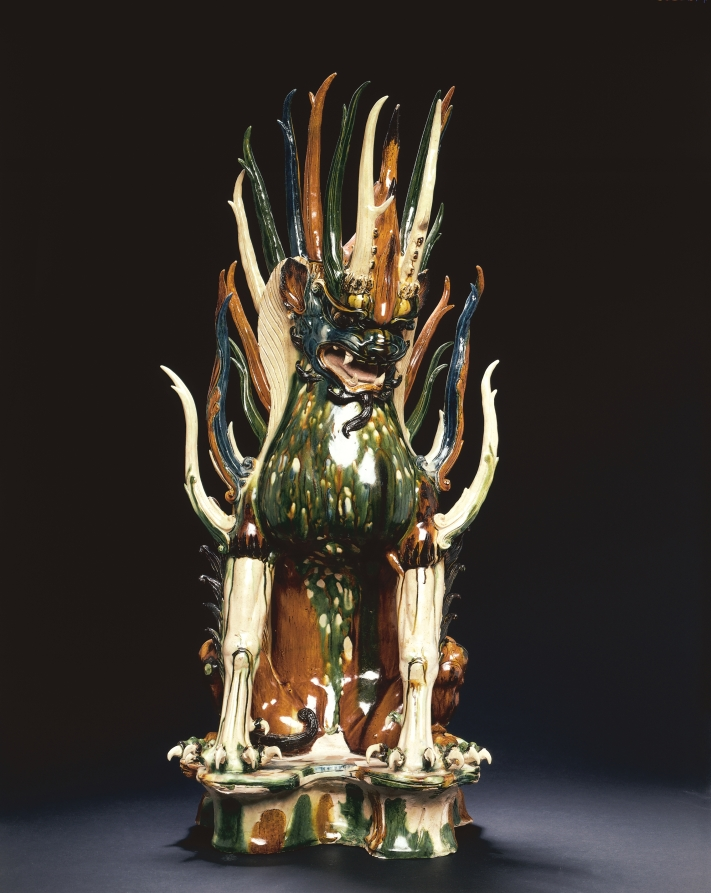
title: Tomb Guardian with Animal Head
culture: China, probably Shaanxi province, Xi'an, Tang dynasty (618-907)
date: early 700s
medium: glazed earthenware, sancai (three-color) ware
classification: Ceramic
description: With their fierce expressions and exaggerated physical features, fantastic guardian creatures were intended to guard the entrance to a tomb, warding off evil as well as keeping the soul of the deceased from wandering. Known as "earth spirits" or qitou, this one has an animal face and a pair of antlers growing above its eyebrows; the other sports a human face with huge protruding ears and a short horn surrounded by fiery, twisting hair. Their many elongated spikes heighten the fearful intensity. Before tomb sculptures were placed in the tomb, they were carried through the streets in a funerary procession. Funerary gifts provided the deceased with means for the afterlife. They were also an expression of filial piety and demonstrated the wealth and power of the descendants.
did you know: Sancai (three-color) glazes in green, amber, and transparent white, plus expensive cobalt blue glaze, show the high social status of the tomb’s occupant.